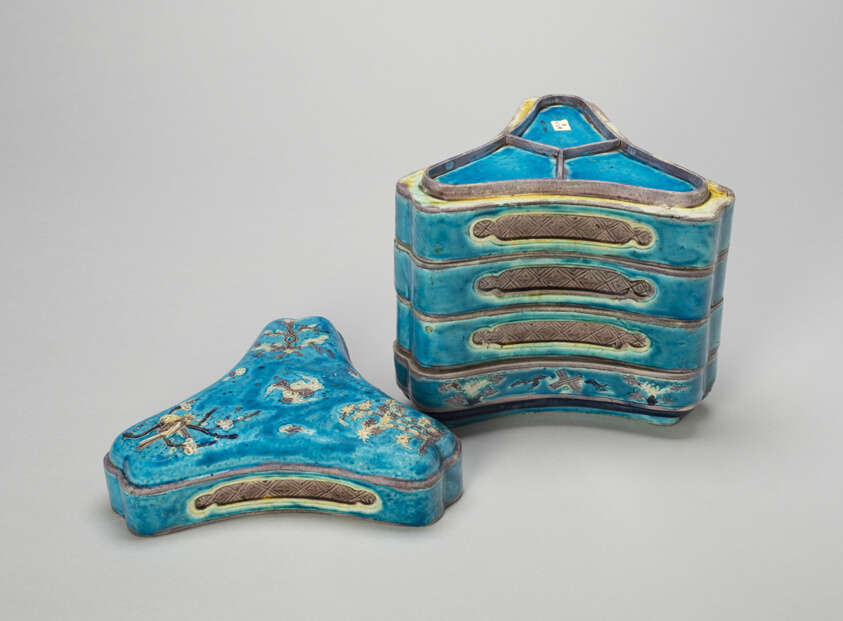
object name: Vessel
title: Triangular Five-Tiered Box with Bamboo, Plum Blossom, and Pine Trees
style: Chinese (culture or style)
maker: China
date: Ming dynasty (1368–1644), 16th century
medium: Fahua ware; porcelain with blue, purple, and yellow glazes and molded and incised decoration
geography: China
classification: porcelain; asian art; ceramics; vessel